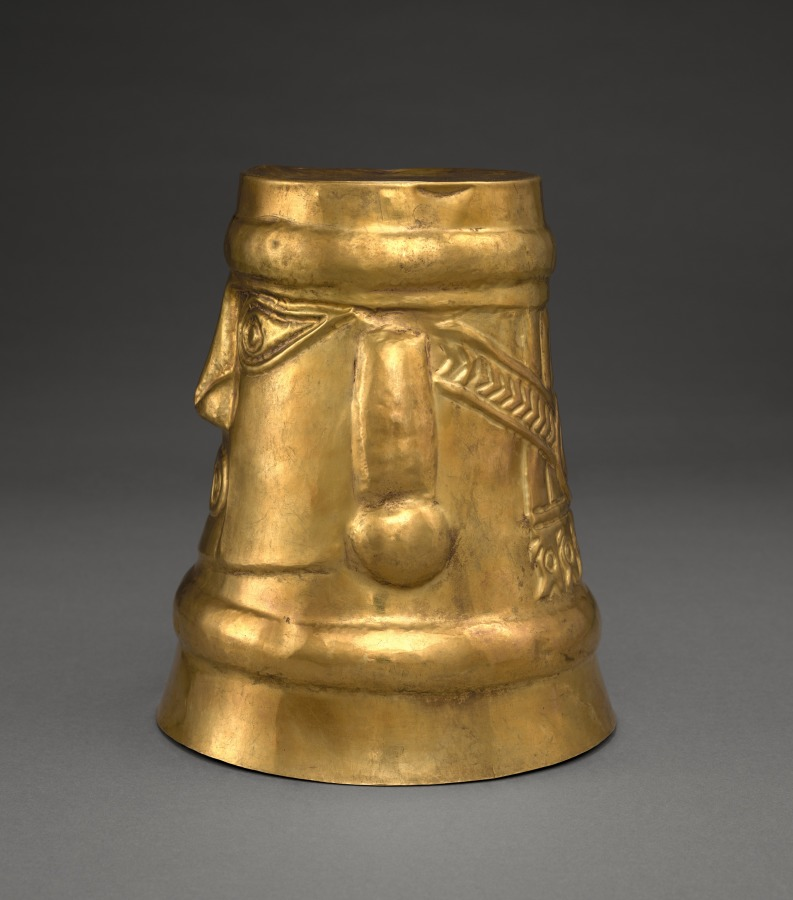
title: Head Beaker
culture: Central Andes (Peru), Lambayeque (Sicán) people, 10th century-12th century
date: 900–1100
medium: gold, hammered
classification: Metalwork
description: Metalworking flourished among the Lambayeque people of Peru’s north coast. Artists made large objects, including containers, in unprecedented numbers; one Lambayeque tomb contained nearly 200 gold or silver beakers. The head on this beaker has been interpreted as the visage of either the culture’s principal deity—its divinity signaled by its feline-like fangs—or the deified founder of the Lambayeque ruling dynasty. It is not known why the head is upright only when the beaker rests on its rim.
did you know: This drinking vessel holds close to 62 oz of fluid—almost half a gallon!